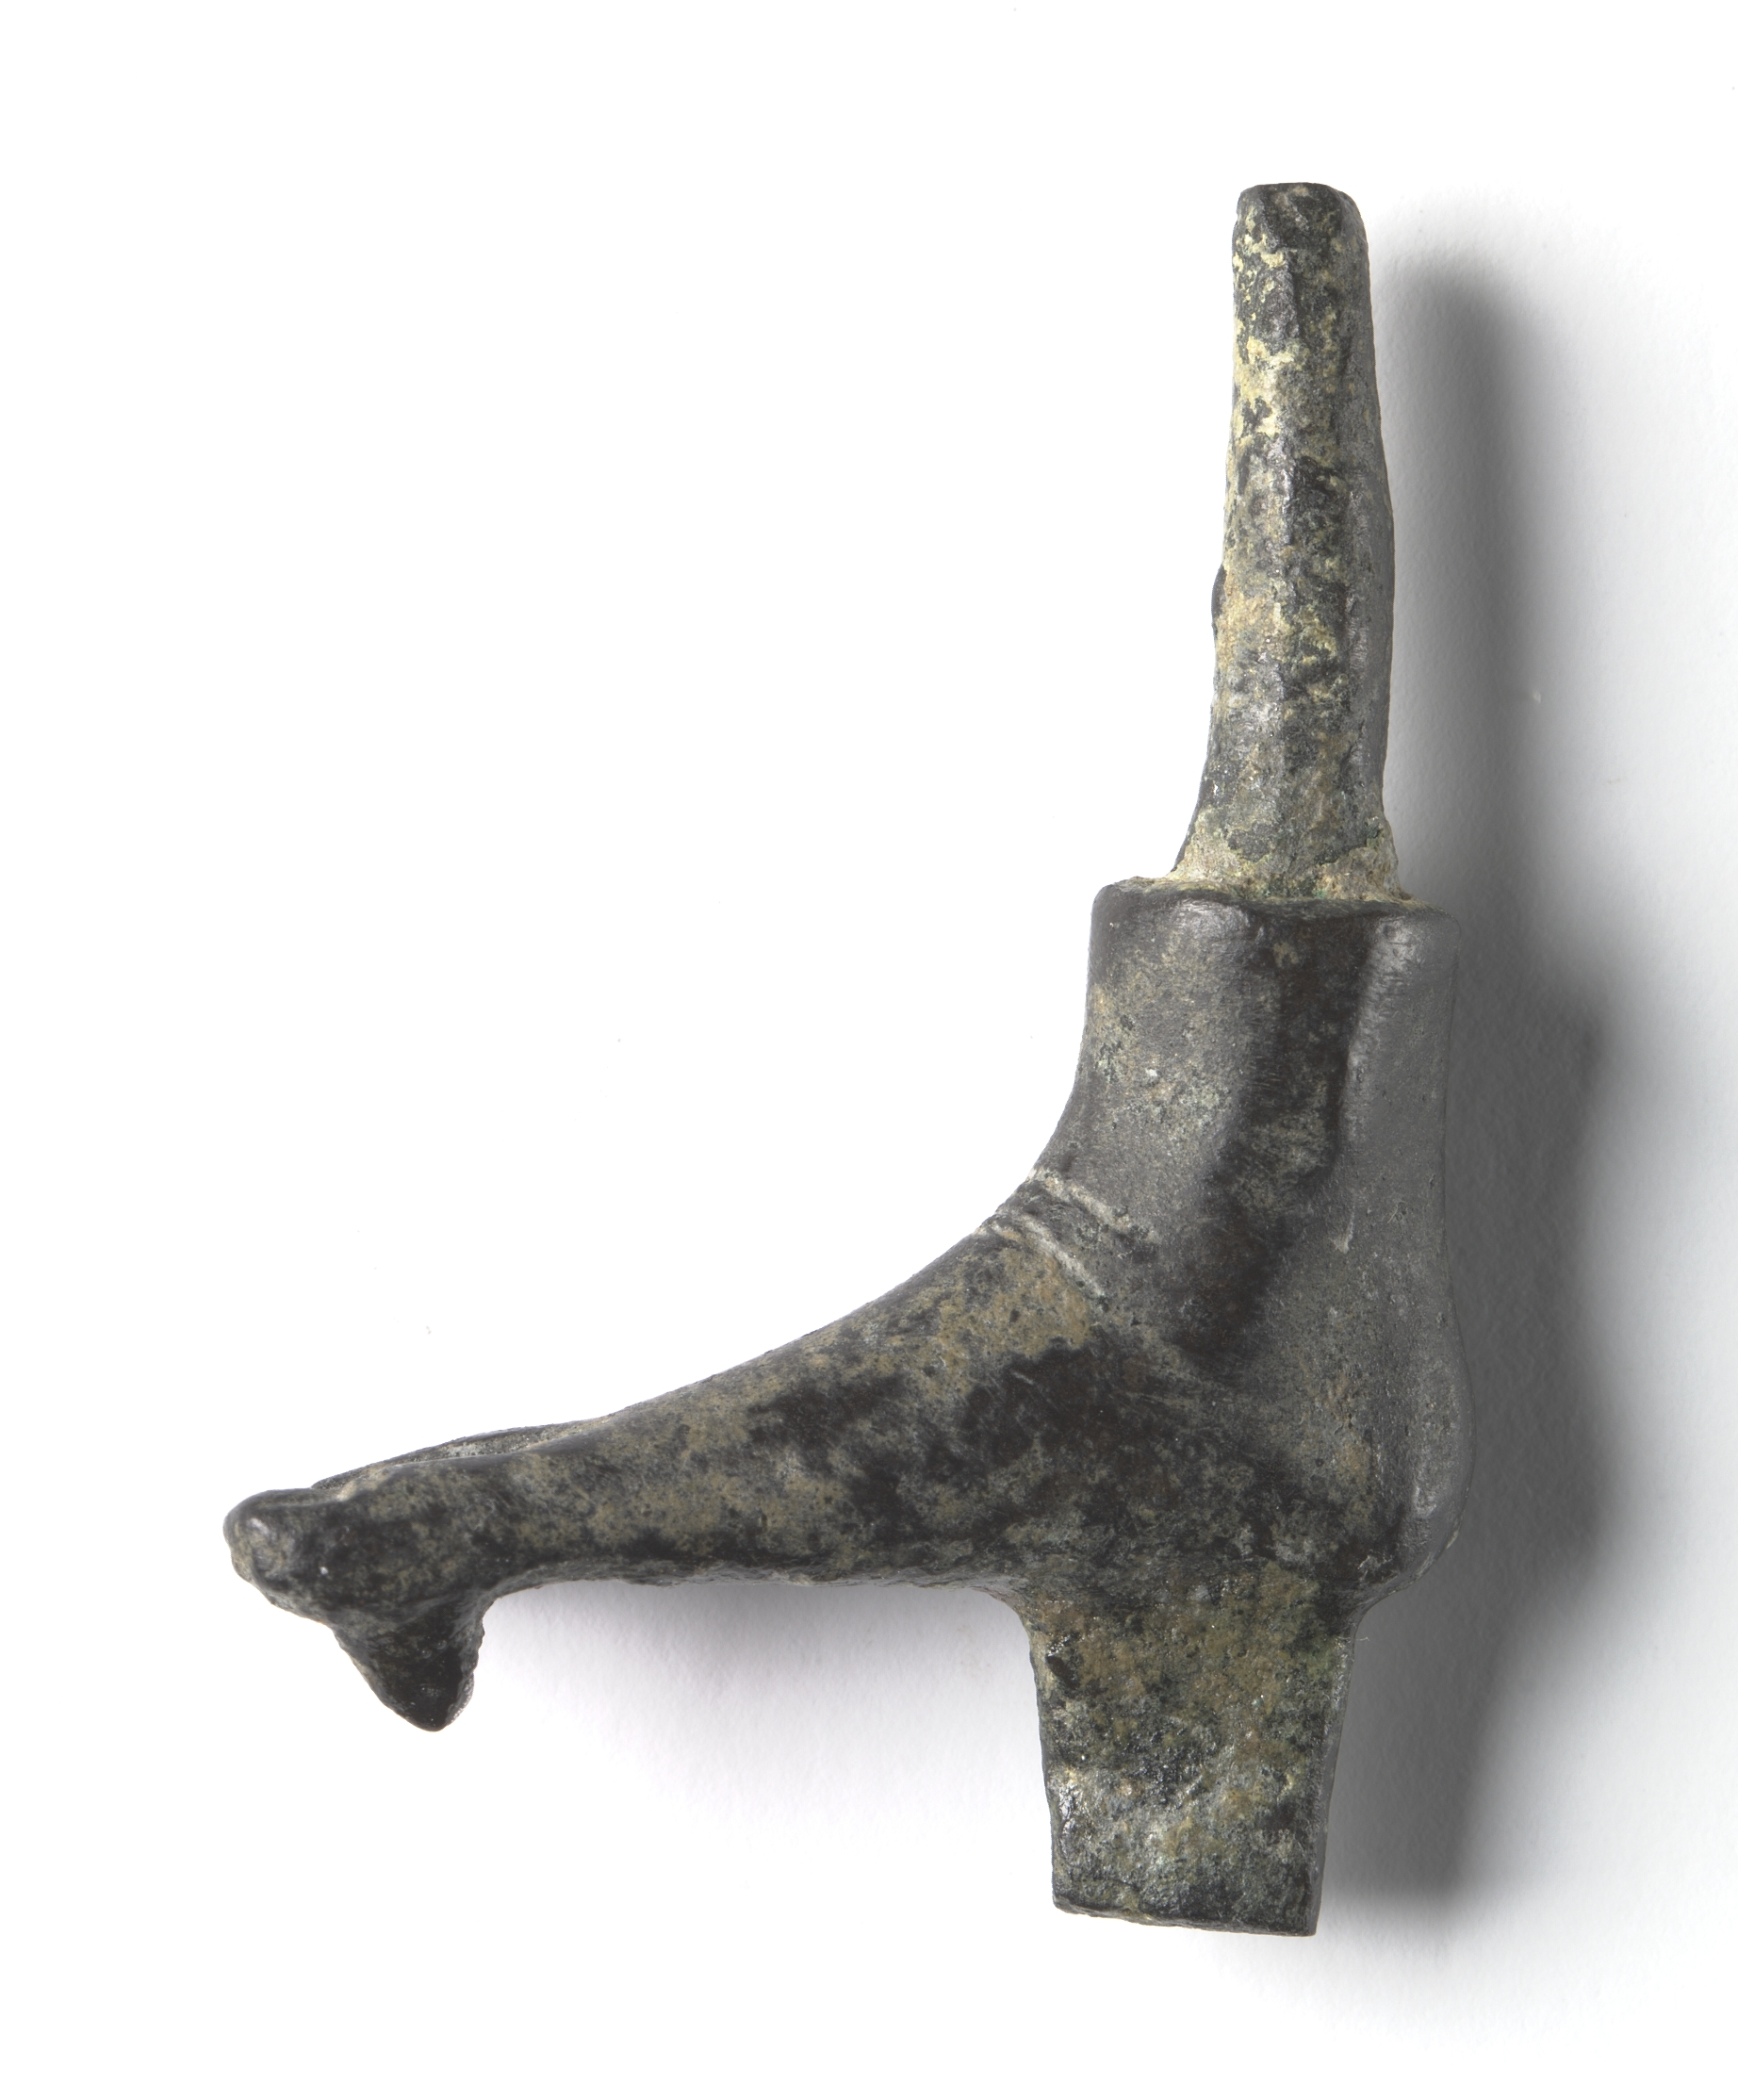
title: Bronze Mount from a "Shawabty Bundle": Right Foot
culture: Egypt, Thebes, Wadi Qubbanet el-Qirud, New Kingdom (1540–1069 BCE), Dynasties 18–19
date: c. 1336–1256 BCE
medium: bronze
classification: Funerary Equipment